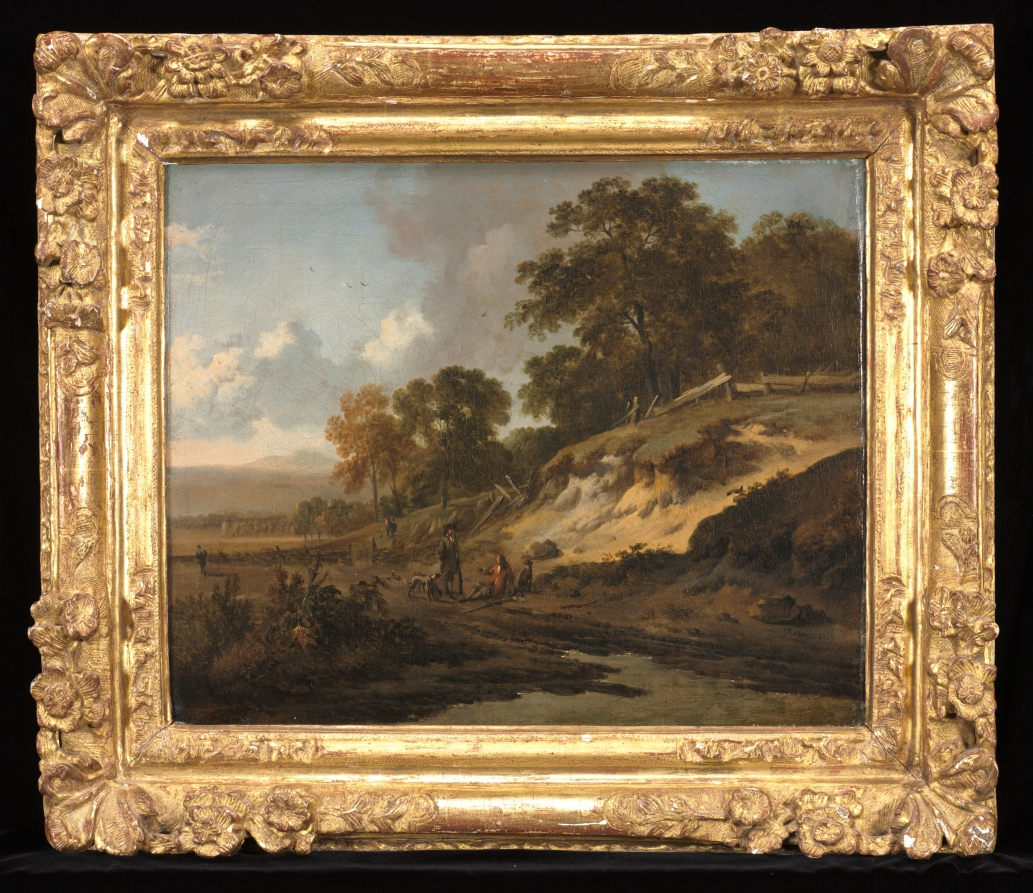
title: Landscape with Hunters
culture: Netherlands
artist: Jan Wijnants (Dutch, 1635–1684)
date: c. 1660–80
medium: oil on canvas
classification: Painting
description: Dune landscapes were a subject of great interest in seventeenth-century Netherlands, among the earliest subjects for independent landscape. They were the bread-and-butter speciality for Wijnants, whose far more unusual Amsterdam canal scene is also in the collection of the CMA.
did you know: To supplement his income as a painter, Jan Wijnants also owned an inn.